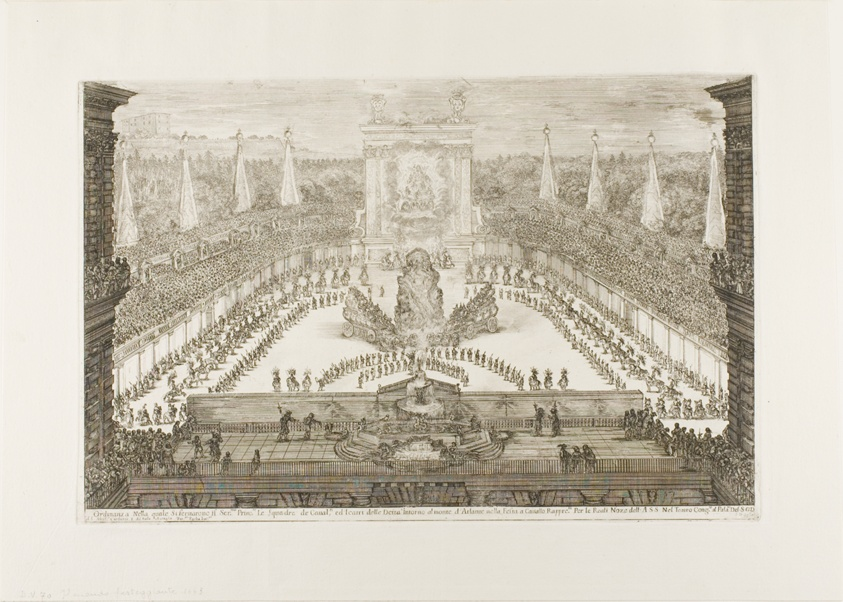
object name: Print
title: The Opening Assembly of the Equestrian Ballet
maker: Stefano della Bella (Italian, 1610-1664)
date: 1661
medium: Etching on ivory laid paper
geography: Italy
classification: etching; print; prints and drawing